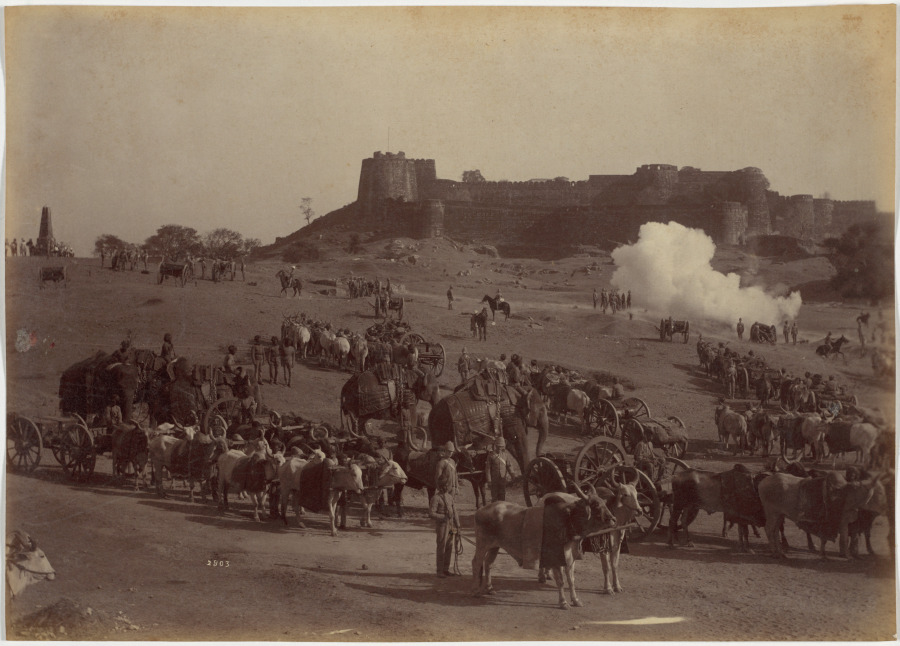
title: Jhansi Fort and Elephant Battery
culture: India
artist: Raja Deen Dayal (Indian, 1844–1905)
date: 1886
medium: albumen print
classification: Photograph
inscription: Imprinted in white in negative on recto: “2803” Stamped in black ink on verso: “36.7.D” Written in pencil on verso: “21 [?]”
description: Exercises involving elephant batteries, which were exotic to European eyes, attracted spectators; photographs of them were excellent souvenirs of these military forces employed by the British Indian Army. Elephants had been employed in warfare in India since at least the 500s BC, but with the advent of heavy artillery, their function switched from attack to support. They transported big guns and supplies and worked in logging and construction. It took many cattle to pull a load that could be handled by two elephants.